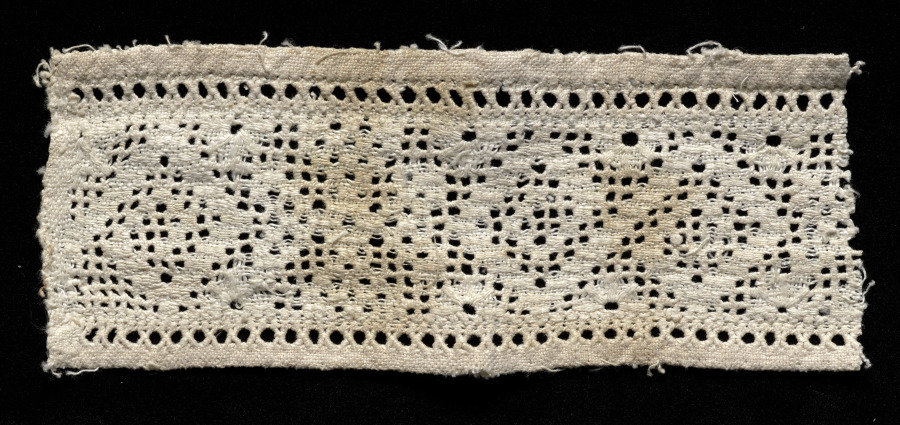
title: Fragment of a band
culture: Spain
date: 1600s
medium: Linen: needle lace (drawnwork)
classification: Lace